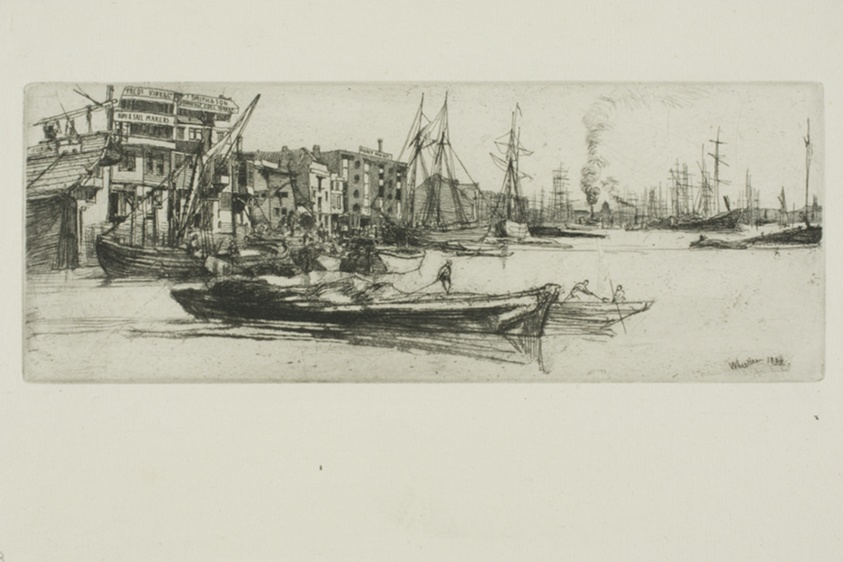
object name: Print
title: Thames Warehouses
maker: James McNeill Whistler (American, 1834-1903)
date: 1859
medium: Etching and drypoint with foul biting in black ink on cream laid paper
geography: United States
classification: etching; foul biting; print; prints and drawing; paper; drypoint